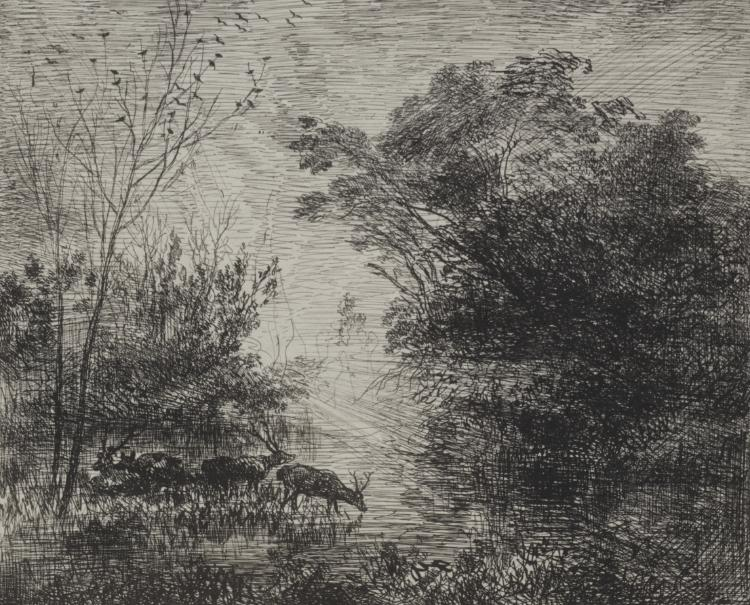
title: Stags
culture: France, 19th century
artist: Charles François Daubigny (French, 1817–1878)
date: original impression 1862, printed in 1921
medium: cliché-verre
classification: Print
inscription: signed, lower right, in glass plate: Daubigny (in reverse)